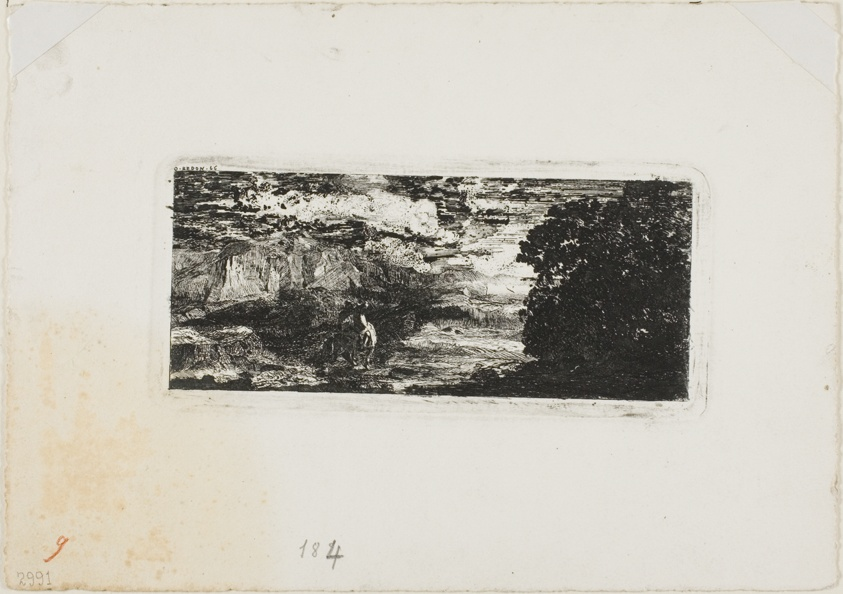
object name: Print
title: Horseman Under a Stormy Sky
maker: Odilon Redon (French, 1840-1916)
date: 1866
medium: Etching on white wove paper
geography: France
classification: etching; print; prints and drawing; paper